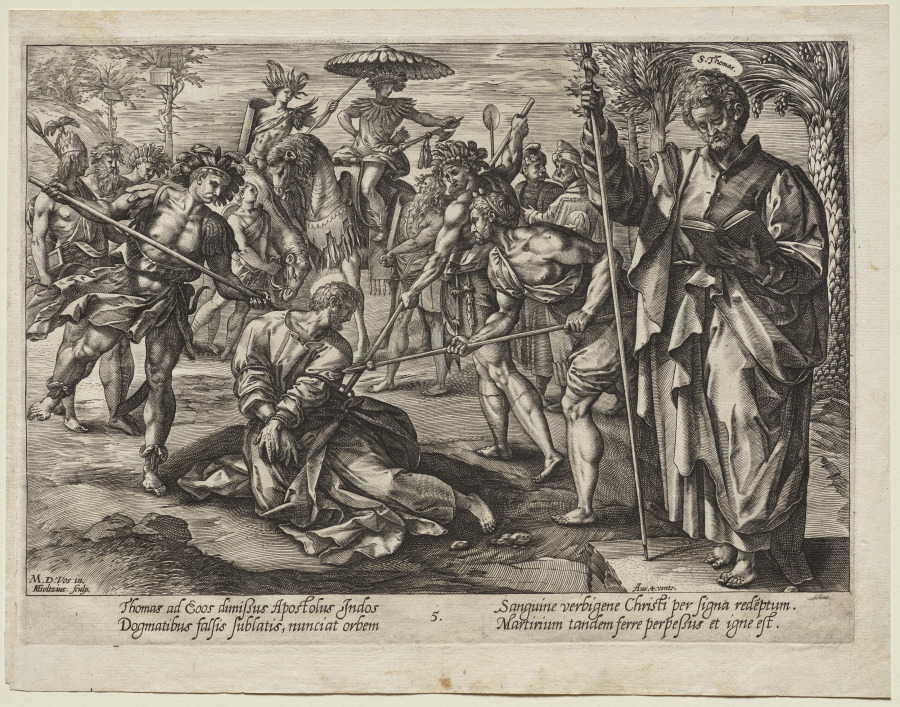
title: St. Thomas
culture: Netherlands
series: Christ, St. Paul, and the Twelve Apostles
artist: Hendrick Goltzius (Dutch, 1558–1617)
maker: after Maarten de Vos (Flemish, 1532–1603)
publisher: Aux Quatre Vents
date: c. 1578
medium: engraving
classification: Print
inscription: Aux.4.vents. bottom right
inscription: Verses in lower margin: Thomas ad…et igne est. In nimbus: S. Thomas. Numbered 5.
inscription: M.D.Vos in. HGoltzius. sculp. bottom left.